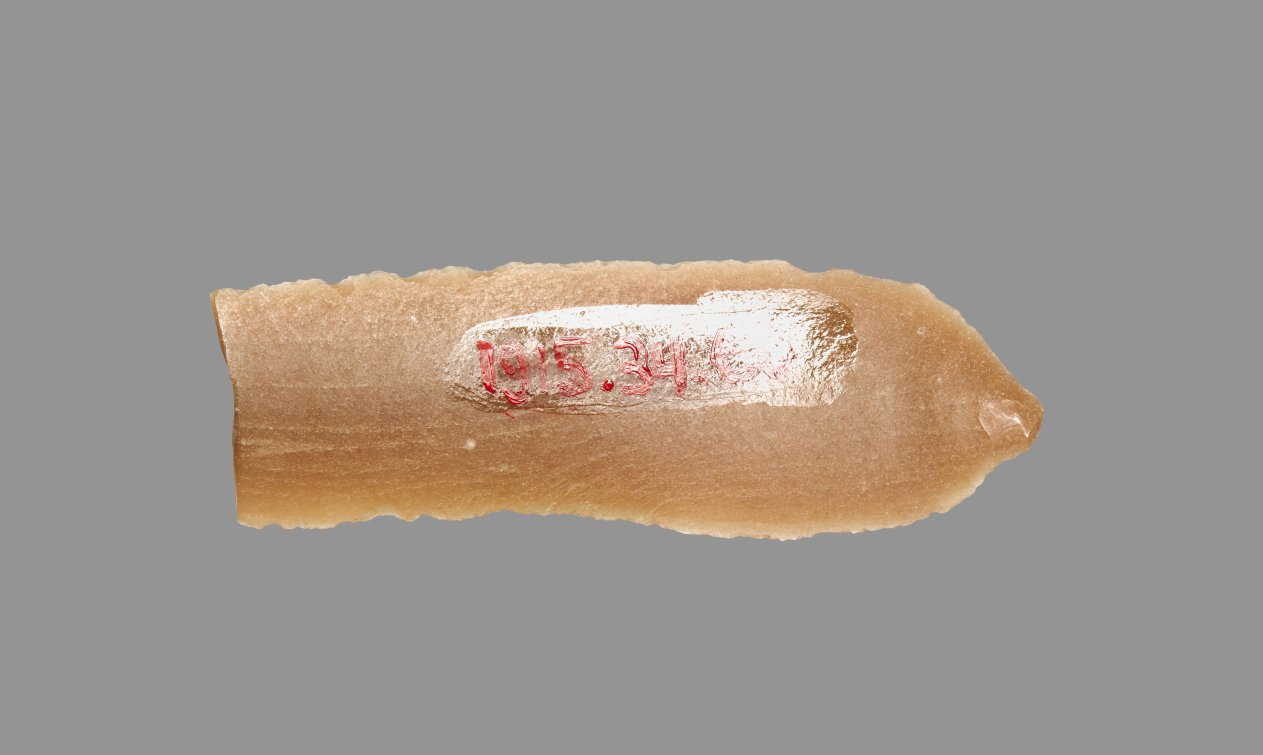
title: Sickle Blade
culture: Egypt, Middle Kingdom (2040–1648 BCE), Dynasty 12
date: 1980–1801 BCE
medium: flint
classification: Implements